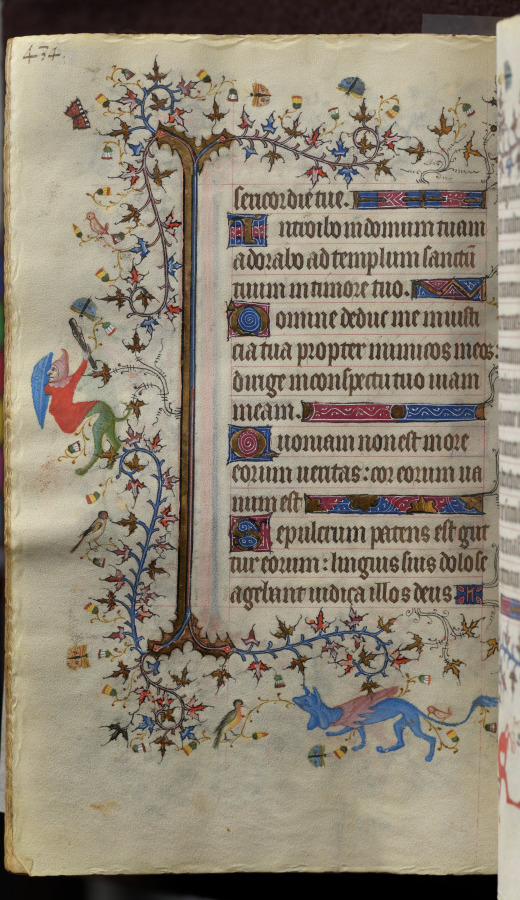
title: Hours of Charles the Noble, King of Navarre (1361-1425): fol. 211v, Text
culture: France, Paris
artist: Master of the Brussels Initials and Associates (French)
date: c. 1405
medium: ink, tempera, and gold on vellum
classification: Bound Volume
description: This precious volume was obviously highly prized by its owner, the French-born King of Navarre, who had his coat of arms painted on no less than twenty folios. Rather than directly commissioning this manuscript from a specific workshop, it seems that Charles the Noble acquired his book of hours -- perhaps ready-made for the luxury market -- while on a trip to Paris in 1404-05. A collaborative effort, six painting styles are evidenced within the pages of this codex, those of two Italians, two Frenchmen, and two Netherlanders. The painter who was responsible for the planning and decoration of the book, and who produced seventeen of the large miniatures, was a Bolognese artist known as the Master of the Brussels Initials. His principal assistant, responsible for most of the borders, was a Florentine who signed his name "Zecho" da Firenze on folio 208 verso.